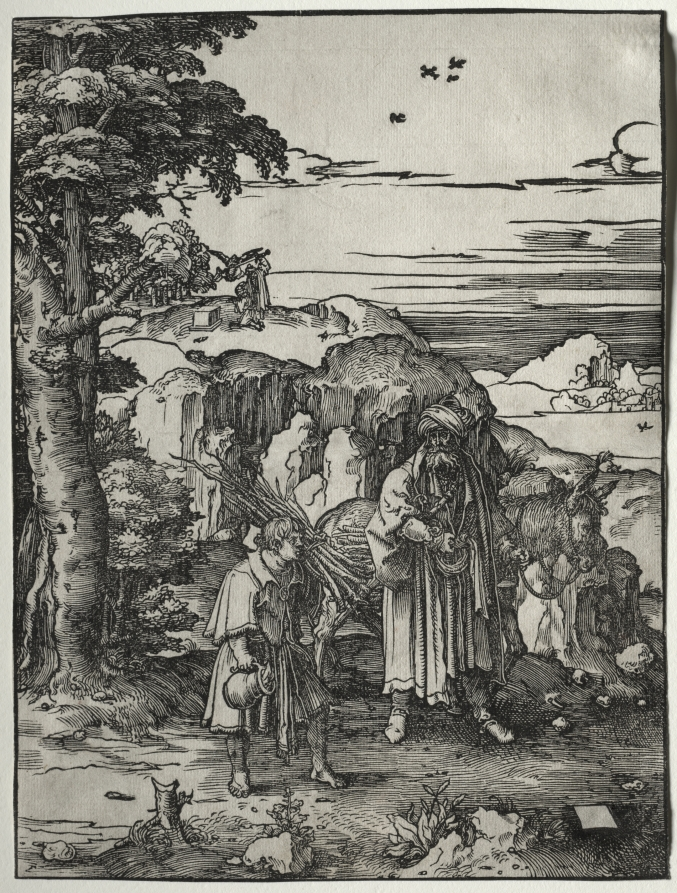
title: Abraham Going to Sacrifice Isaac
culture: Netherlands, 16th century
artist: Lucas van Leyden (Netherlandish, 1494–about 1533)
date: 1517–19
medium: woodcut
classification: Print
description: Abraham Going to Sacrifice Isaac was the culmination of Van Leyden's achievement in woodcut. He harmoniously balanced relatively straight, short, uniform hatching strokes, creating areas of tone, with vigorous, yet restrained lines for contours and descriptive detail. Spatial clarity and pictorial richness emphasize the artist's poignant approach to the subject. Because many believe Isaac's carrying of the wood to his own sacrifice prefigures Christ's bearing of the cross to Calvary, the actual journey of Abraham and Isaac becomes as significant a subject as the moment when Abraham prepares to sacrifice his son.